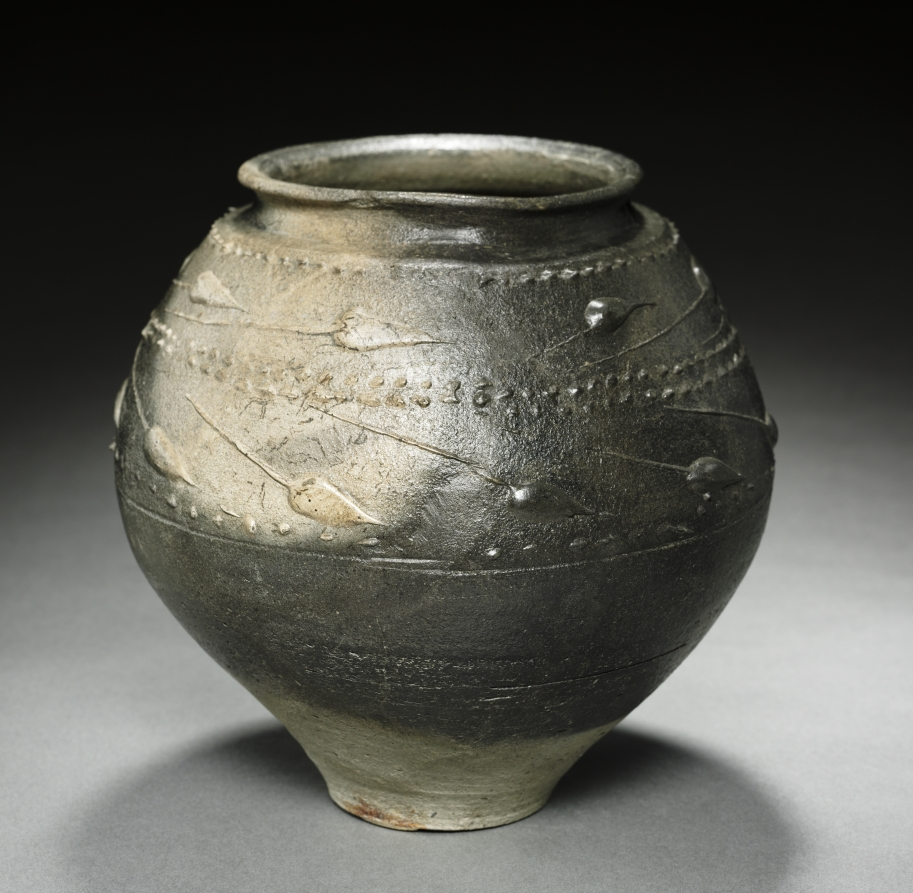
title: Globular Pot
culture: Rhenish (Cologne), Gallo-Roman, 2nd quarter 1st Century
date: 25–50 CE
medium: gray ware with black burnished slip and Barbotine decoration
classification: Ceramic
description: This pot is decorated with a pattern of leaves arranged in two rows, separated by parallel lines of dots. The vessel was thrown on a potter’s wheel and covered in a dark slip, leaving about two inches above the foot bare. After the Romans occupied Gaul (modern day France and Belgium) in the 1st century BCE, pots like this one with dark brown or black slips became increasingly popular in the northern provinces of the Roman Empire.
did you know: This pot’s decoration was applied using the barbotine method, in which a reed or horn is used to pipe clay slip onto the surface.